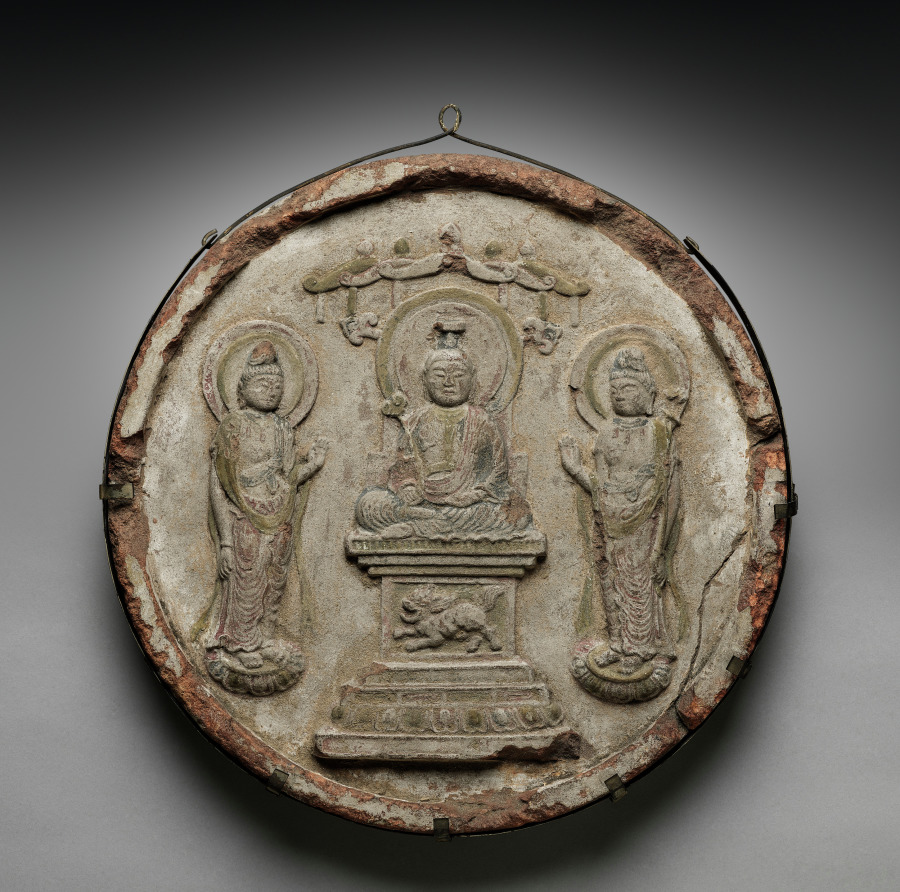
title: Monju Triad (obverse)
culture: Japan, Meiji period (1868–1912)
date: ?1868–1912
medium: Earthenware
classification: Sculpture